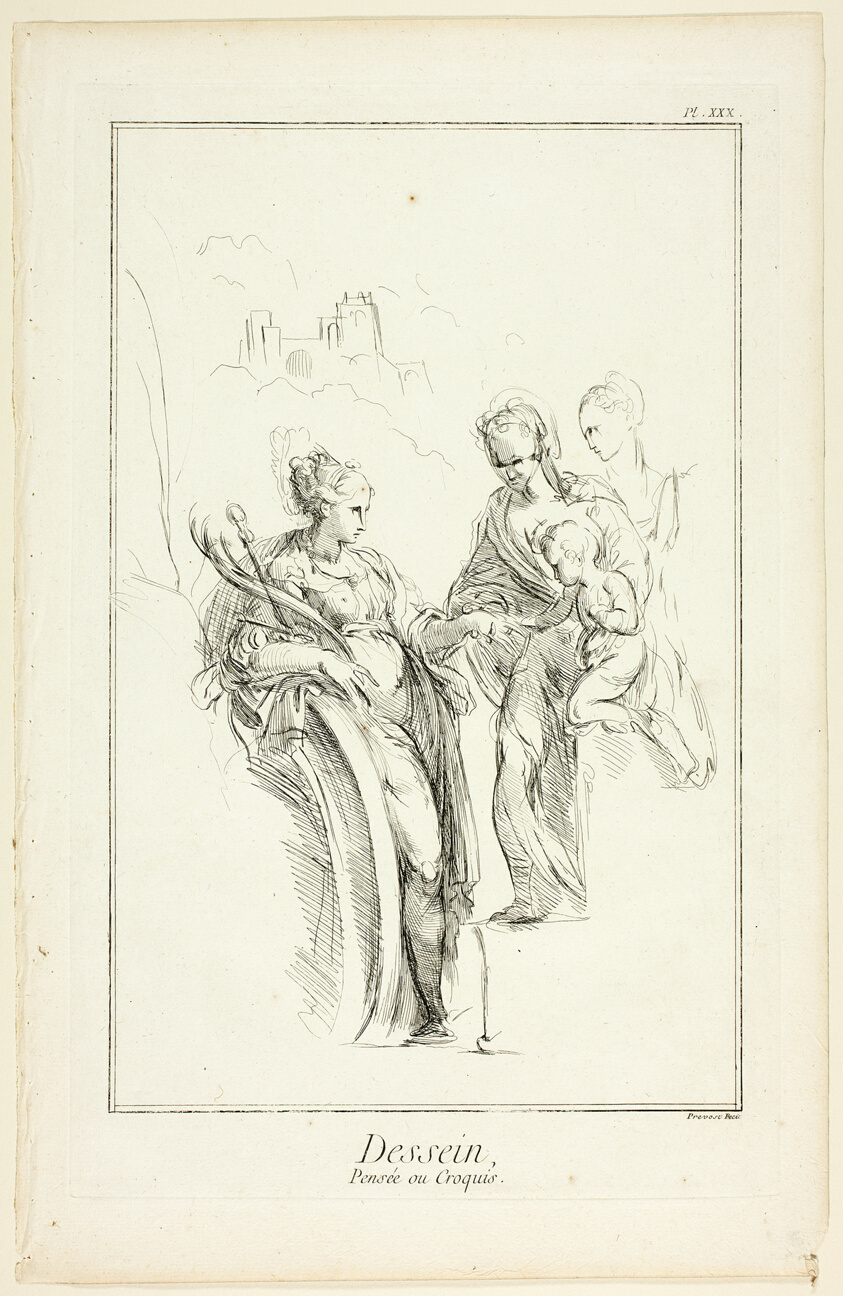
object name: Print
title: Design: Sketch, from Encyclopédie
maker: Benoît-Louis Prévost (French, c. 1735-1809); published by André le Breton (French, 1708-1779), Michel-Antoine David (French, c. 1707-1769), Laurent Durand (French, 1712-1763), and Antoine-Claude Briasson (French, 1700-1775)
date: 1762/77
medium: Etching, with engraving, on cream laid paper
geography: France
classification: etching; print; prints and drawing